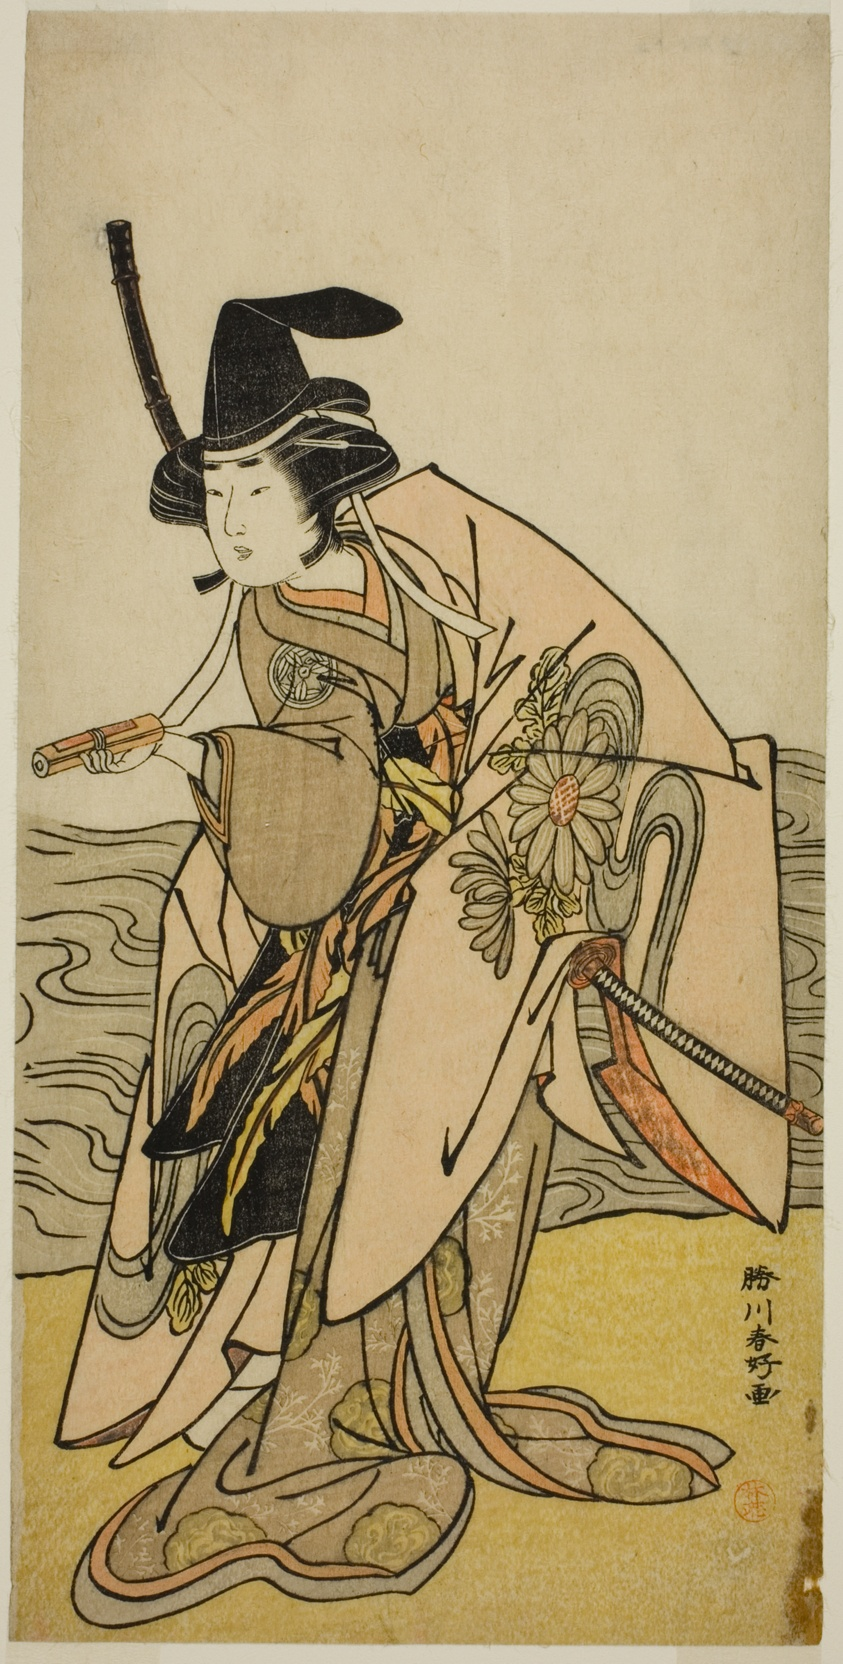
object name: Print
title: The Actor Yamashita Kinsaku II as Lady Kikusui (Kikusui Gozen) in the Play Kaeribana Eiyu Taiheiki, Performed at the Nakamura Theater in the Eleventh Month, 1779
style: Japanese (culture or style)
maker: Katsukawa Shunko I; Japanese, 1743-1812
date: c. 1779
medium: Color woodblock print; hosoban; right sheet of diptych (?)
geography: Japan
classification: woodblock print; print; asian art